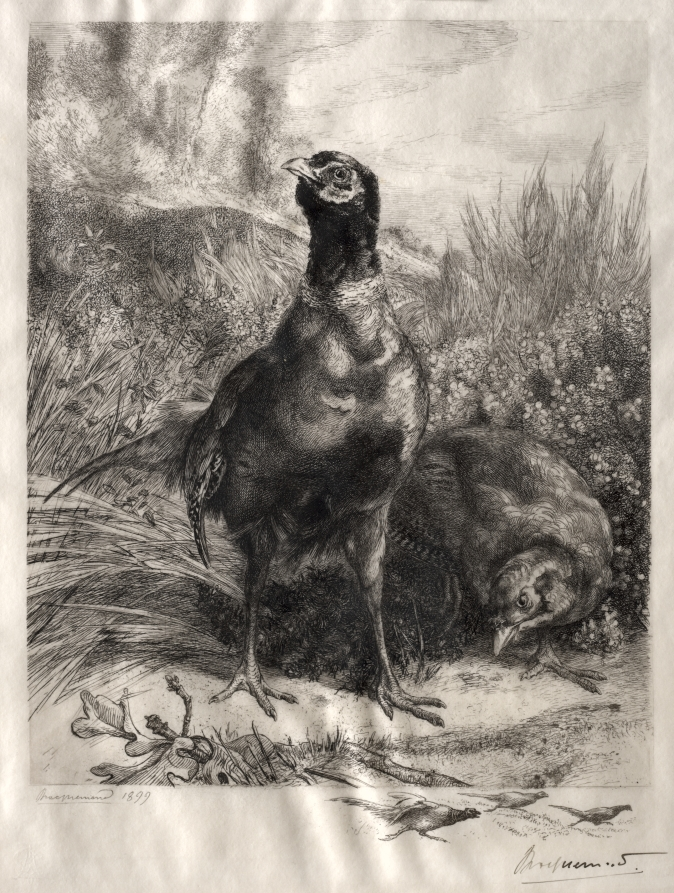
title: The Pheasants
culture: France, 19th century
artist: Félix Bracquemond (French, 1833–1914)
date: 1899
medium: etching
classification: Print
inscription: signed lower right margin, in black ink: Bracquemond; printed: Bracquemond 1899